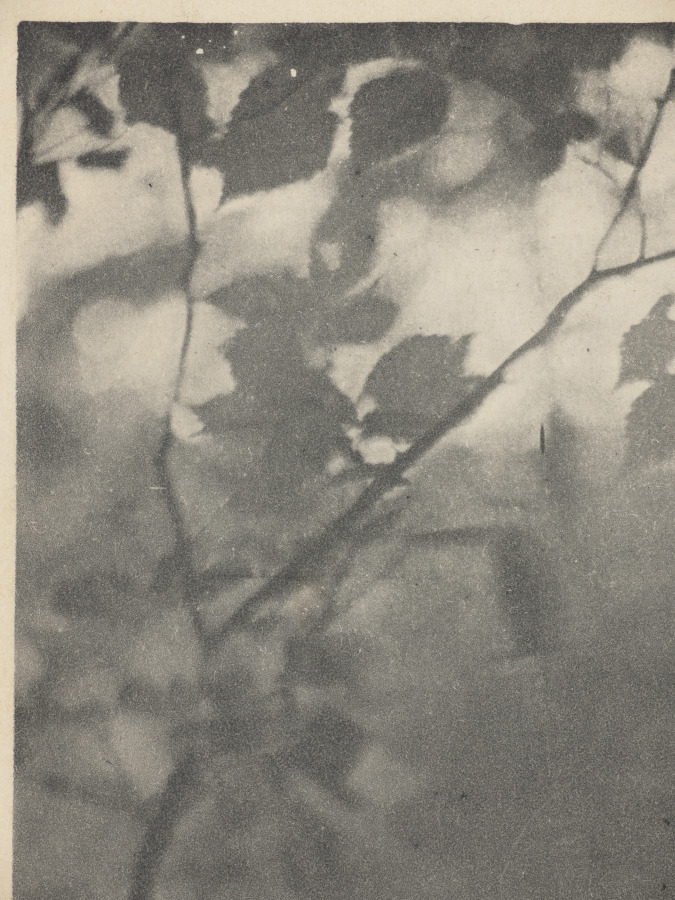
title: The Edge of the Wood - Evening (Letitia Felix)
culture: America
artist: Clarence H. White (American, 1871–1925)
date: 1900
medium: photogravure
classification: Photograph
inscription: Written in pencil on recto: "Clarence H. White [signed] '00"; in pencil on verso: " 'The Edge of the Wood-Evening'- / Clarence H. White"; in pen on verso: "Letitia Felix"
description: Clarence H. White experimented with an array of artistic media that blurred the lines between photography, drawing, and printmaking. Here are two examples of that experimentation: a platinum print on the left and a photogravure on the right. White was likely drawn to both processes for their broad tonal range and interaction of image and paper. To create platinum prints, a light-sensitive liquid emulsion is applied to and absorbed by the paper. The image forms within the paper’s fibers, resulting in a matte appearance. Because photogravures are printed like an etching, the image is formed with ink impressed onto the paper’s surface.